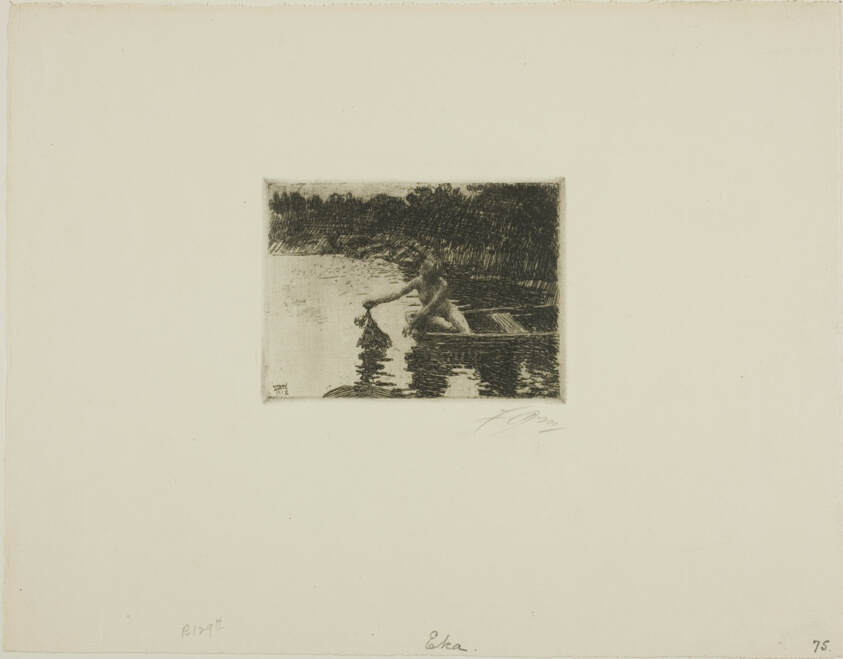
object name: Print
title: Eka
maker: Anders Zorn (Swedish, 1860-1920)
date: 1913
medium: Etching on ivory laid paper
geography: Sweden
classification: etching; print; prints and drawing